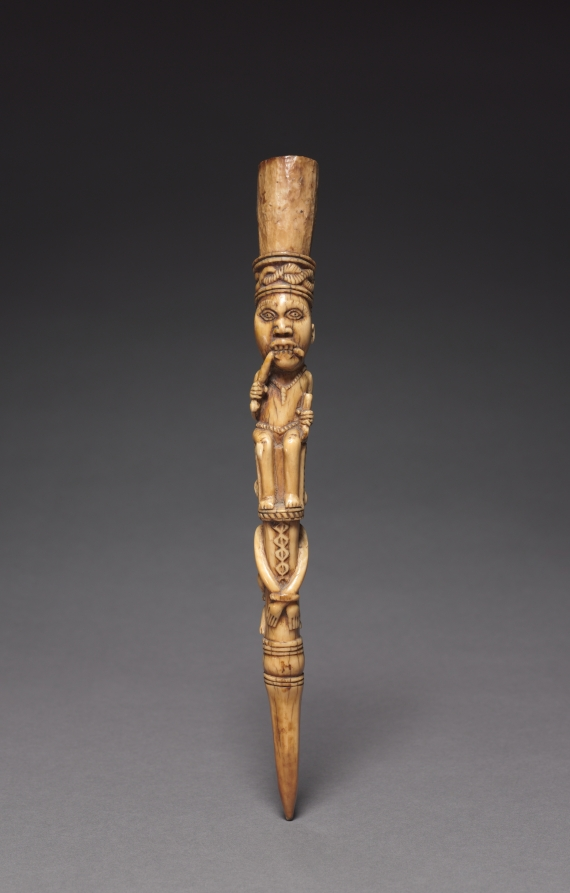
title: Scepter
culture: Africa, Central Africa, Democratic Republic of Congo (most likely), Cabinda, or Republic of Congo, probably Kongo-style (Yombe sub-group) carver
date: late 1800s–early 1900s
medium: ivory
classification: Implements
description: Used by male chiefs, ivory scepters were symbols of status indicating worldly authority and supernatural influence. The use of ivory implies that the chief has the fatal power of an elephant. The figurine shows a chief enthroned on the bound body of a criminal destined for such a death. A medicine package would have been enclosed within the container extending from the figure’s head, bestowing supernatural powers.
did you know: Scepters often represent the chief sitting atop a bound prisoner or attribute to a violent death.